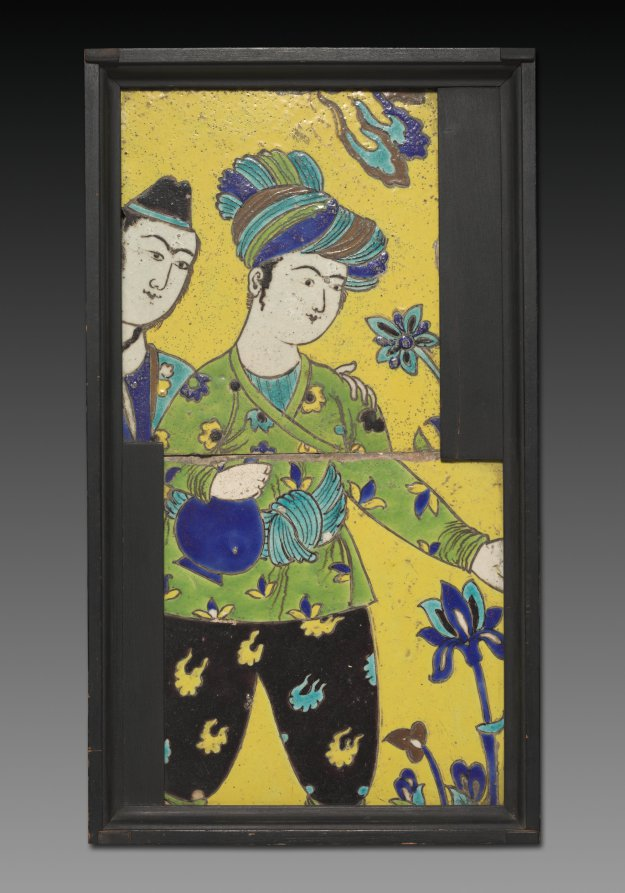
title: Wall Tile with a Man Carrying a Wine Bottle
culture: Iran, Isfahan, Safavid period (1501-1722)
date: 1600s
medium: faience, cuerda seca technique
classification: Ceramic